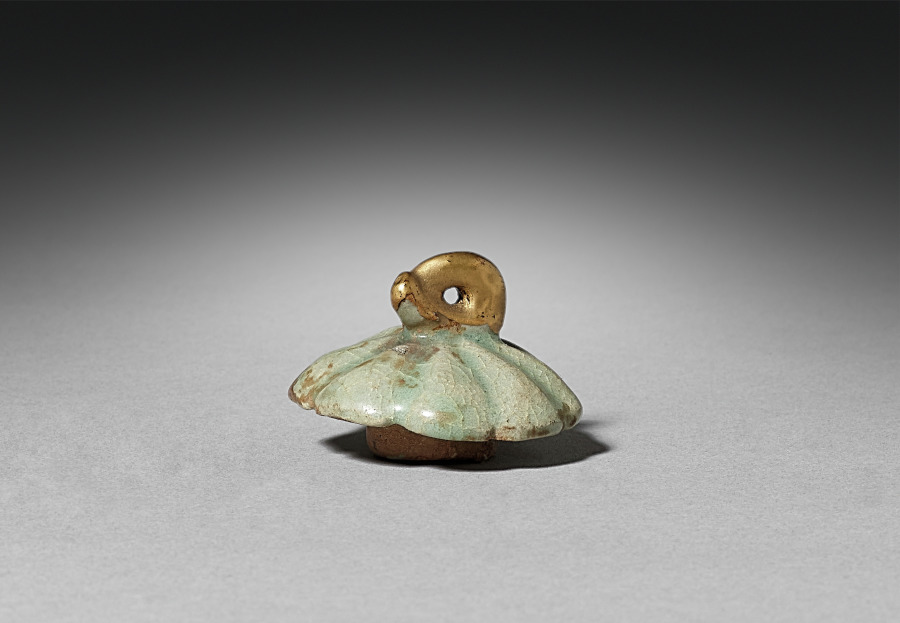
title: Melon-shaped Wine Ewer (lid)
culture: Korea, Goryeo dynasty (918–1392)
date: 1100s-1200s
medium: celadon ware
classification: Ceramic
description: Many celadon ceramics, such as these two miniature pots, have been repaired with gold lacquer. Termed kintsugi (literally meaning “gold joinery”) in Japanese, this restoration method highlights broken parts with glittering gold mixed with lacquer. Initiated in 15th-century Japan, the technique follows a popular aesthetic concept called wabi-sabi, which finds beauty in imperfect things. Goryeo celadons were considered rare treasures among early 20th-century Japanese collectors; thus, their broken condition is brilliantly highlighted in gold lacquer, as seen here in the repaired spouts, handle, and lid.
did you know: This miniature wine pot was buried in a tomb for the soul of the deceased.